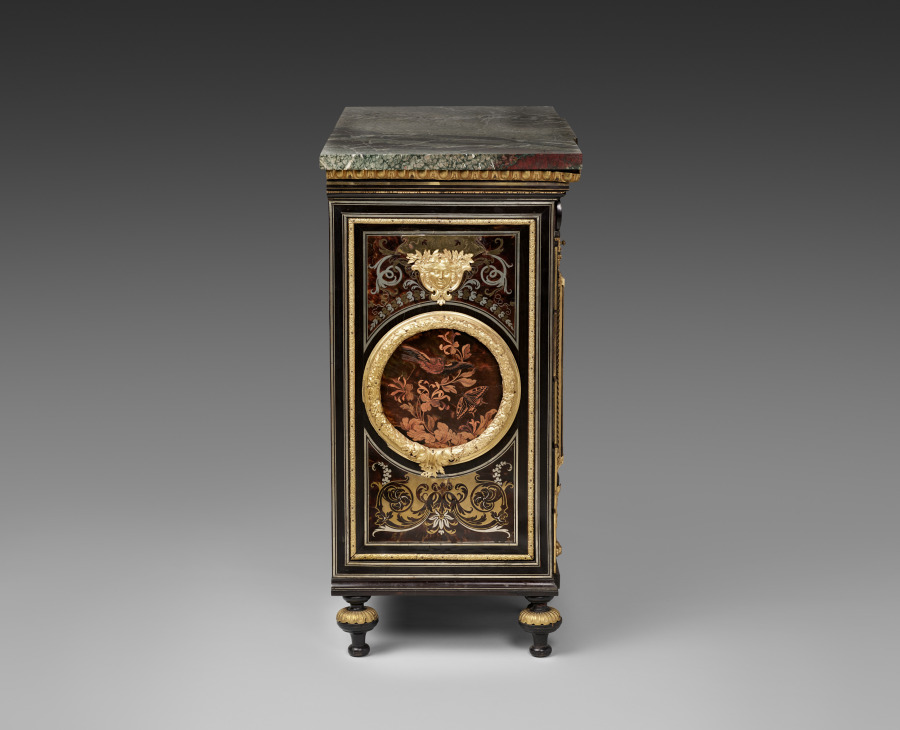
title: Cabinet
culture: France, late 17th Century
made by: André-Charles Boulle (French, 1642–1732)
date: c. 1690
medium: ebony, marquetry in metal and tortoise shell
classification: Furniture and woodwork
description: Appointed cabinetmaker to King Louis XIV in 1672, André-Charles Boulle became a master of furniture making in France during the late 1600s until his death in 1732. Known primarily for his use of marquetry, in which metal patterns are inlaid into tortoiseshell then applied within the veneered surface of the furniture, Boulle established a level of quality and craftsmanship few others could achieve. As a result, his work found favor at the royal court and among other aristocrats and diplomats eager to impress the king. The inclusion of a medallion depicting Louis XIV within the bronze decoration of this chest would have identified the owner with the royal court. Often exhibiting stout architectural proportions with elegant groups of inlaid motifs such as the parrot on the central panel of this chest, Boulle’s designs are an example of the intellectual fashion for contrasting ideas, materials, and motifs.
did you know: Originally designed to sit atop an elaborate tall stand, this chest was likely altered in the late 1700s to reduce its scale and height.